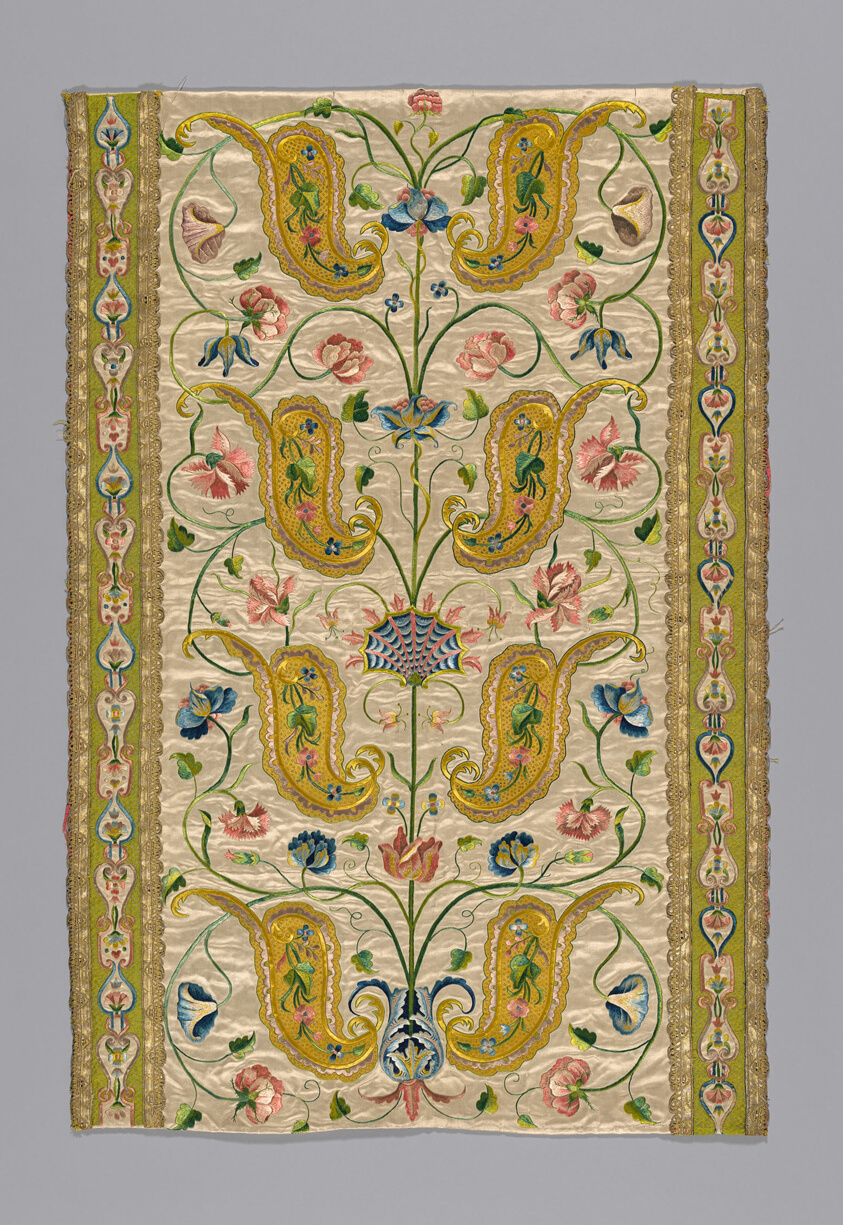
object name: Textile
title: Panel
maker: Italy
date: 19th century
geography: Italy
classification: textile; needlework (visual works)